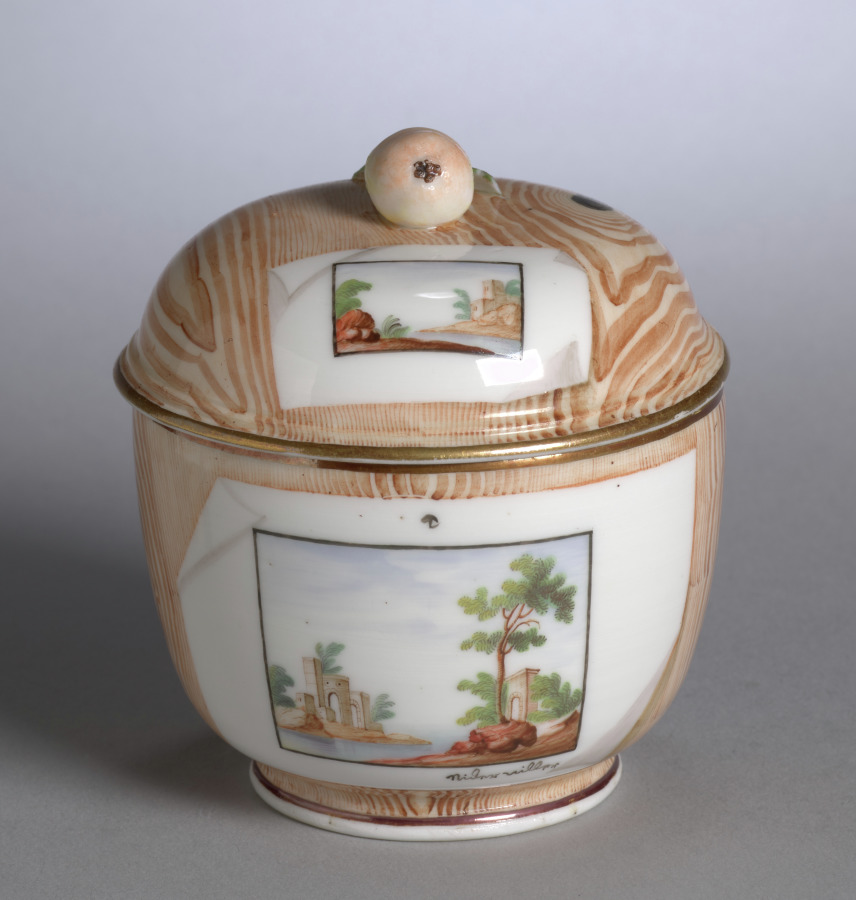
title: Covered Bowl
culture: France, 18th century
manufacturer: Niderviller Factory (French)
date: c. 1775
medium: Hard-paste porcelain with enamel and gilt decoration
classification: Ceramic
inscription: [Inscribed at lower right corner of two trompe l'oeil prints]: "Niderville"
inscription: [Interlaced 'CC', in black]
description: This covered bowl is decorated with pieces of paper painted in trompe l’oeil, an effect that gives two-dimensional surfaces the illusion of extending into three-dimensional space, on a faux bois, or fake wood, background. This unique style of decoration was likely invented at Niderviller, but taken up by other European porcelain factories including those at Locré, Vienna, and Tournai.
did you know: Established in 1749, the Niderviller porcelain factory remained in operation following the 1789 French Revolution, though its owner, Adame Philippe, count of Custine, was executed in August of 1793.